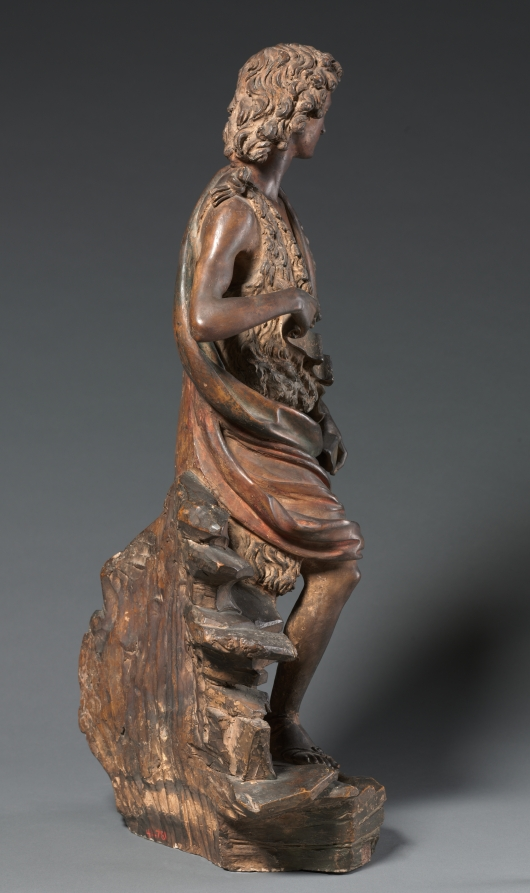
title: Saint John the Baptist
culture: Italy, Florence, 16th century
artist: Master of the Saint John Statuettes (Italian)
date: c. 1500–1525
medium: terracotta with traces of polychromy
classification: Sculpture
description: This statuette belongs to a group of terracotta sculptures representing David (from the OldTestament) and Saint John (from the New Testament) produced by a still unidentified Florentine artist and his studio in the late 1400s and early 1500s. Giventheir scale, it seems likely that these sculptures were intended for use in private homes rather than churches.